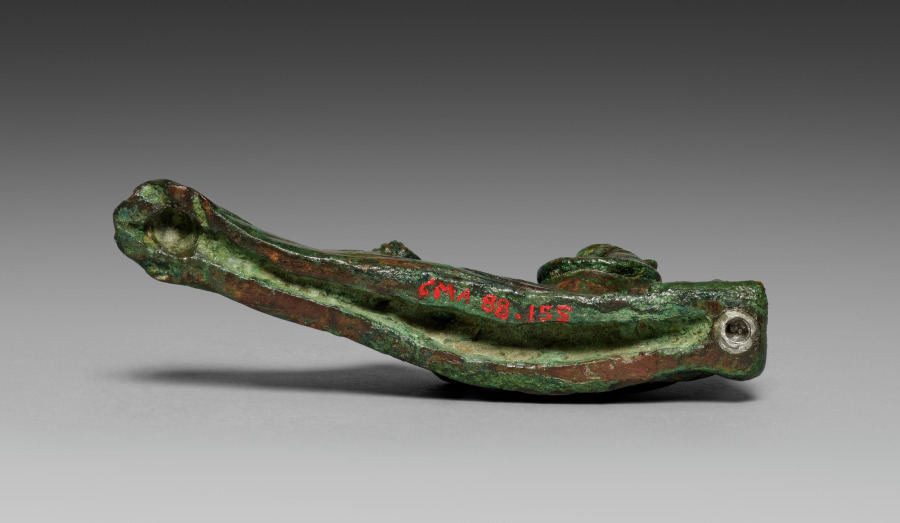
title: Vessel Ornament of Banqueter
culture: Etruscan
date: probably 400–375 BCE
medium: bronze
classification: Sculpture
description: This bronze banqueter figurine was one of six once adorning the rim of a large basin, now lost. Cast in molds with individualized details, most have grooves on their underside to attach to the basin. Minute traces of gilding remain on areas of clothing and skin (mostly visible only under magnification), suggesting that they may have been completely gilded. Two handles in the form of hippocampi, horses with serpentine tails, also belonged to the basin and are now displayed at the Michael C. Carlos Museum at Emory University. The basin may have been used to hold liquid for a banquet, or was perhaps funerary. This banqueter tilts his head toward his left hand, which may have once held an object, now lost. His right arm rests on his hip. Unlike the other banqueters, this figurine does not have exposed feet and his body curves slightly when viewed from above. This suggests that this figurine may have been made for a different initial use before being added to this set.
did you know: The Etruscan banquet shared similarities with the Greek symposium where guests reclined and drank wine.